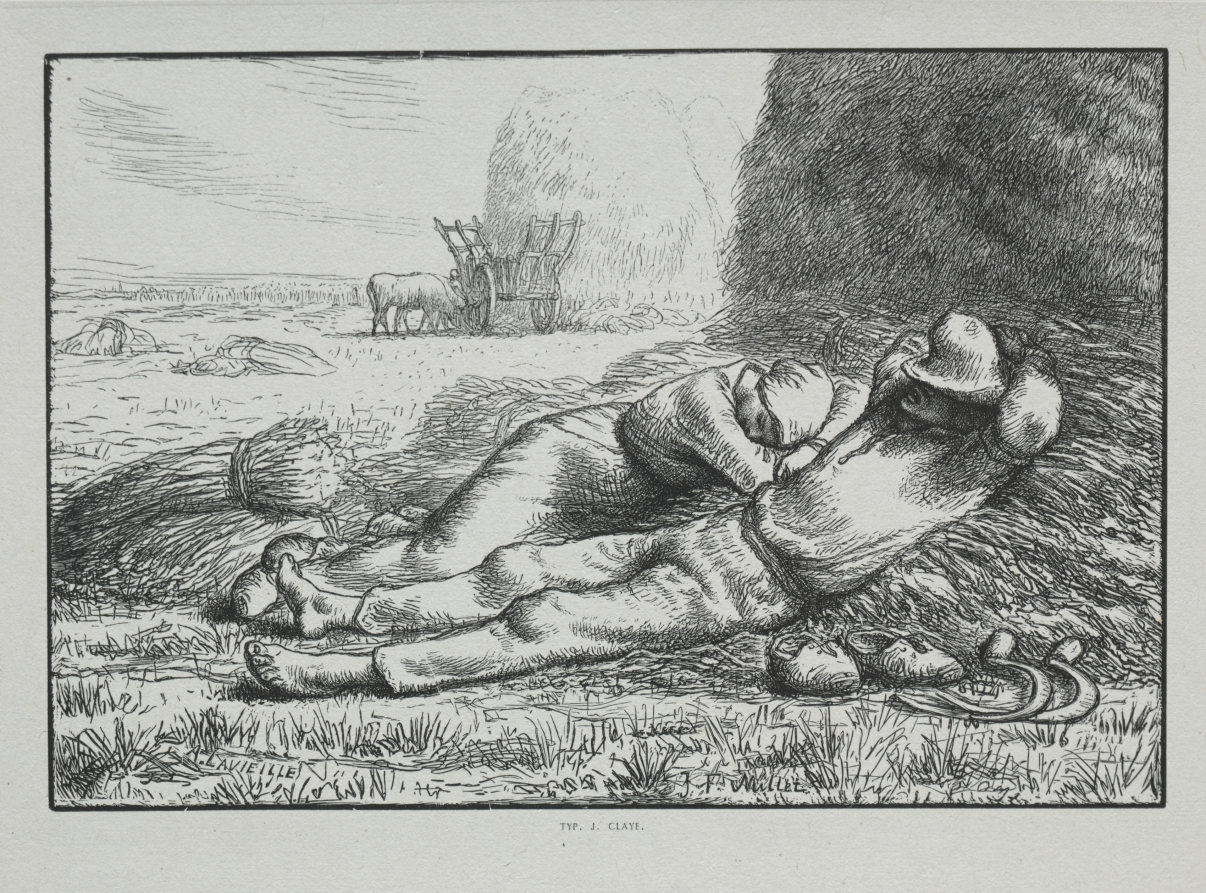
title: Four Hours of the Day: Noon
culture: France, 19th century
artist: Adrien Lavieille (French, 1818–1862)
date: 1860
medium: wood engraving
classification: Print